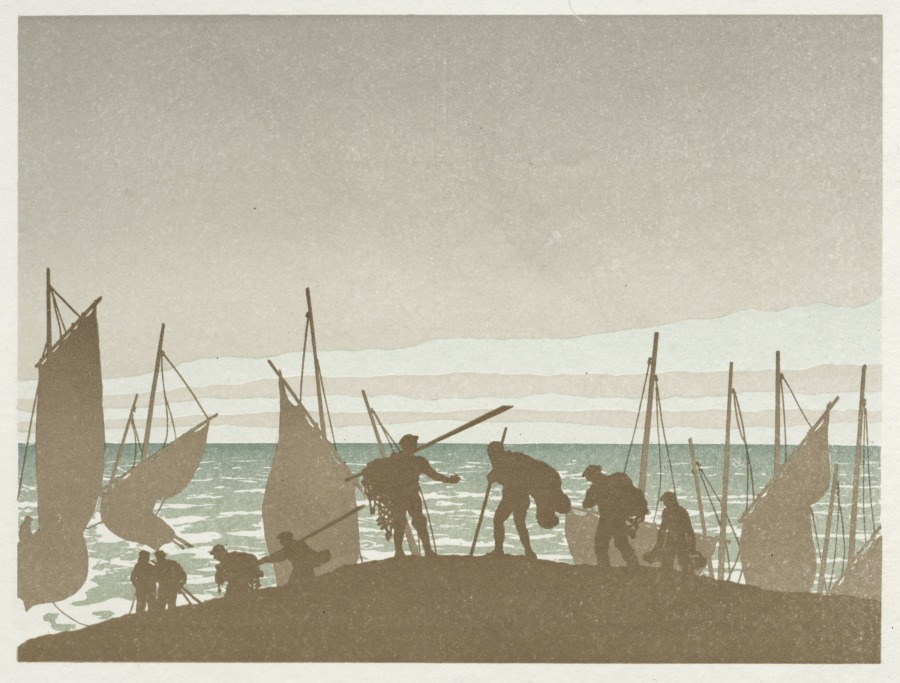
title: The Wandering Jew: The Fishermen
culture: France, 19th century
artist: Henri Rivière (French, 1864–1951)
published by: Verneau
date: 1896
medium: color lithograph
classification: Portfolio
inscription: title page is signed, in blue crayon: Henri Rivière